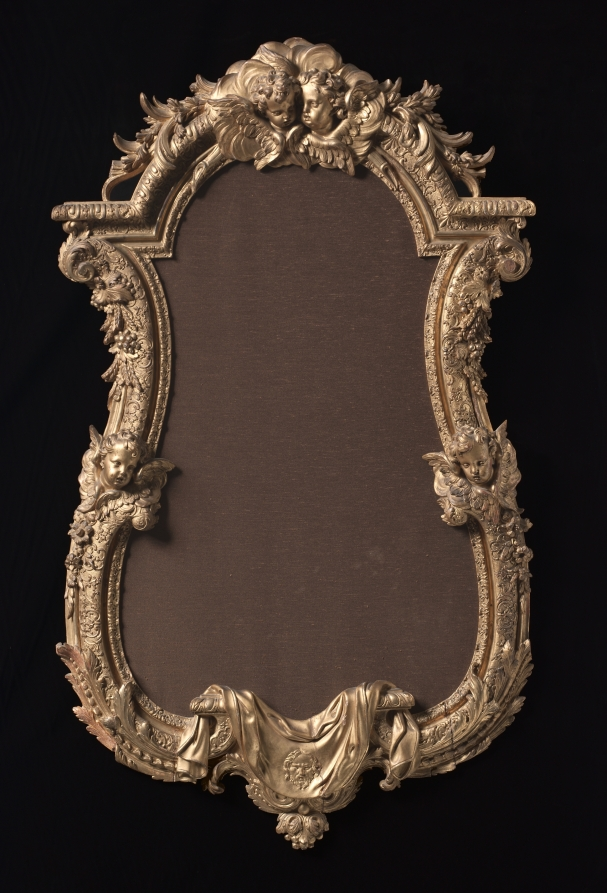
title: Frame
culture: France, early 18th Century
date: c. 1710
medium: carved and gilt wood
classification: Furniture and woodwork